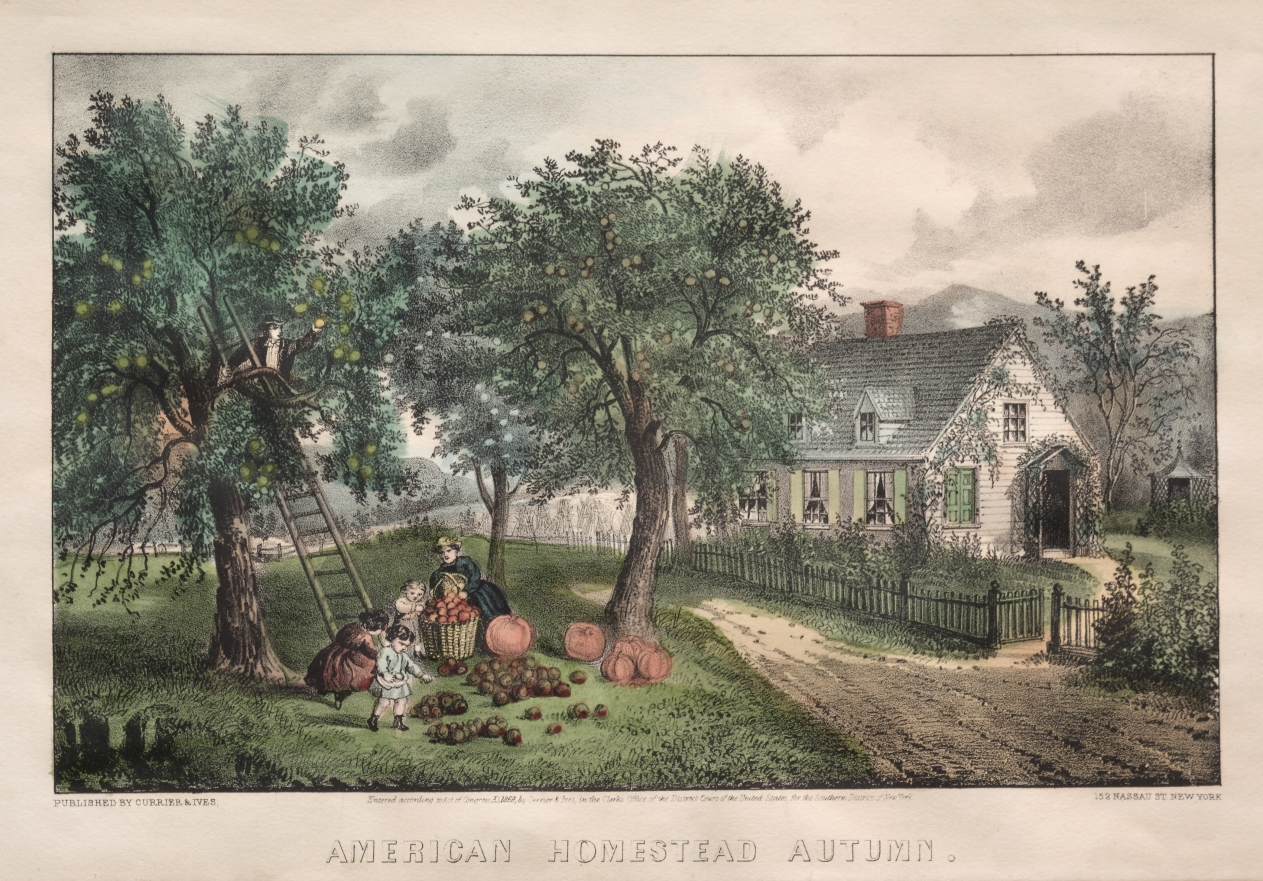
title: American Homestead, Autumn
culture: America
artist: and James Merritt Ives (American, 1824–1895)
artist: Nathaniel Currier (American, 1813–1888)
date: 1869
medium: lithograph, hand colored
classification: Print